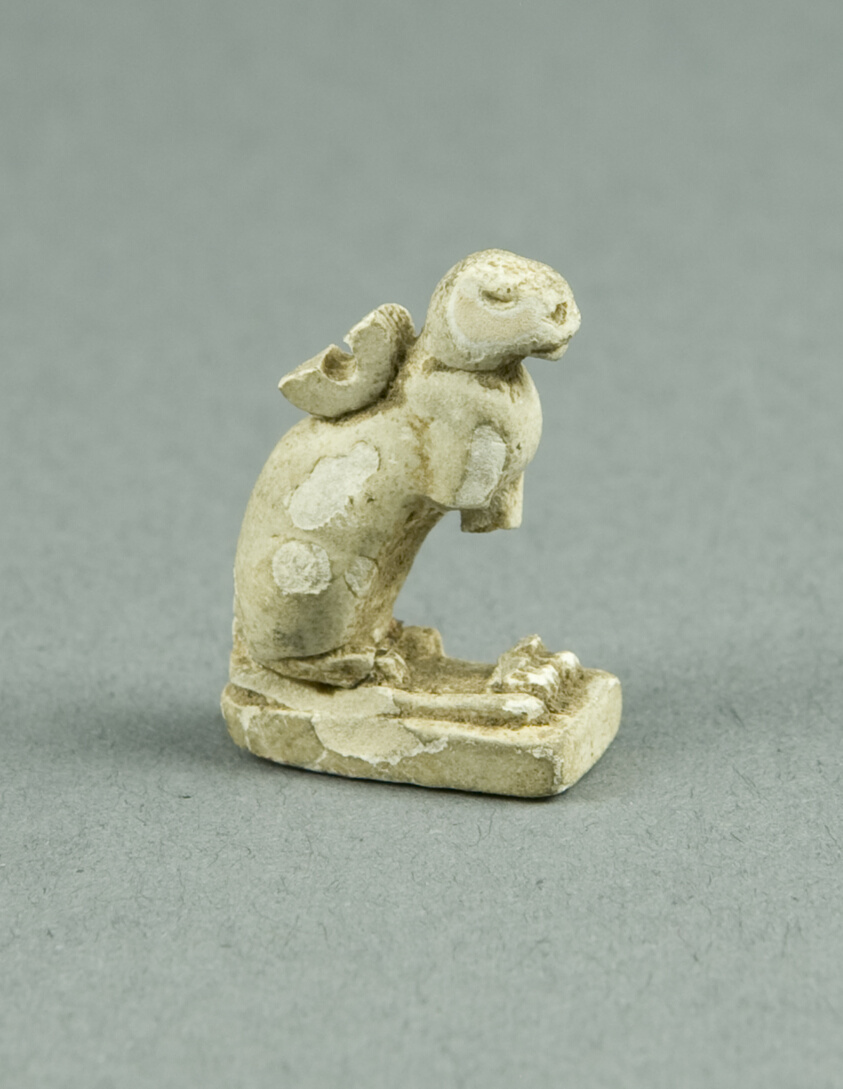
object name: Costume and Accessories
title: Amulet of the Goddess Bastet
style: third intermediate period, egyptian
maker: Egyptian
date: Third Intermediate Period, Dynasty 21–25 (1070–656 BCE)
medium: Ceramic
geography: Egypt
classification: amulet; jewelry; ceramics; ancient art; costume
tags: goddesses